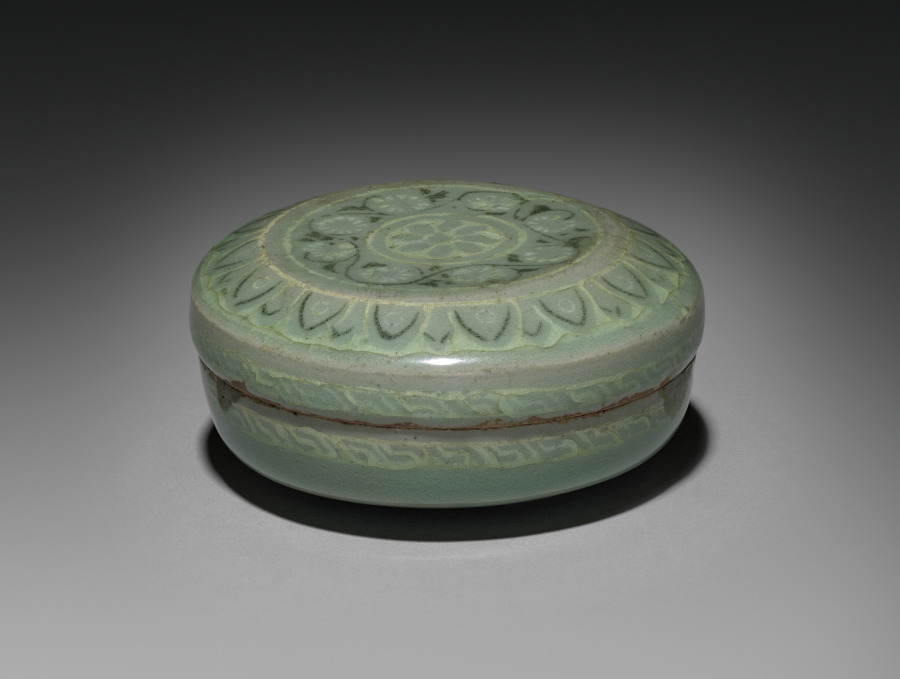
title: Box and Cover with Inlaid Chrysanthemum Design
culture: Korea, Goryeo dynasty (918–1392)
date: 1200s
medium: celadon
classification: Ceramic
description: Celadons, spoons, seals, and bronze mirrors were the most common burial objects in tombs during the Goryeo period (918-1392). Once used to contain color powder, rouge and eyebrow gel for makeup, this small container was one of the standard goods that furnished elites' tombs. Goryeo-period women and men used the grain powder of rice or millet for whitening their skin, safflower extract for rouge, and plant ash or soot for eyebrow gel. Yet, natural-looking make-up seems to have been the most favorable one in Korea according to the travelogue by Xu Jing (1091-1153), the Chinese diplomat who visited Korea in 1123.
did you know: This ceramic container was used to store incense or cosmetics.